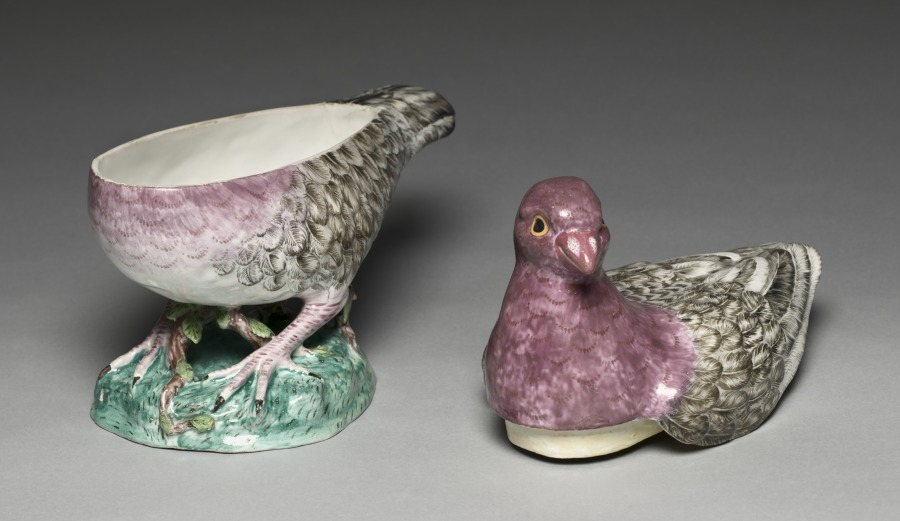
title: Covered Tureen in the Form of a Pigeon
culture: France, 18th century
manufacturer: Sceaux Factory (French, active 1748–66)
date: c. 1760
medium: Tin- glazed earthenware (faience) wth enamel decoration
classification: Ceramic